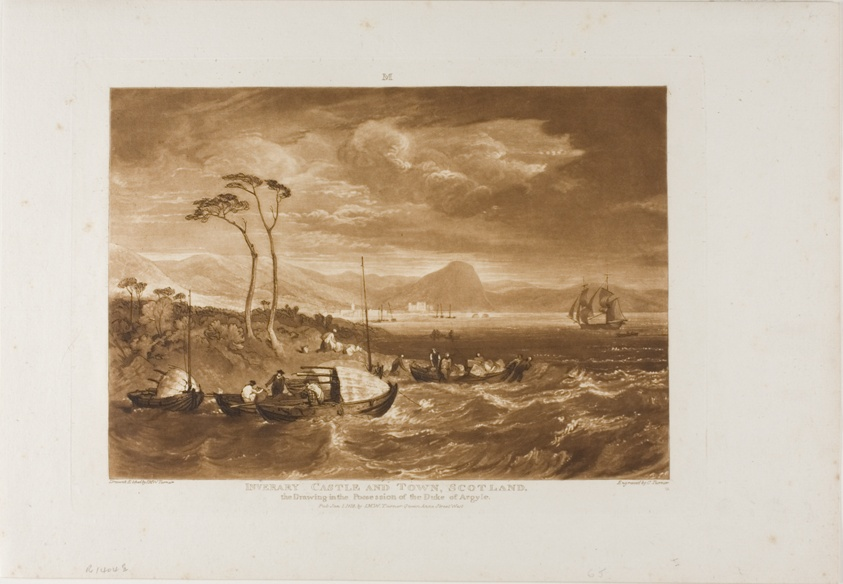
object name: Print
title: Inverary Castle and Town, plate 65 from Liber Studiorum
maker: Joseph Mallord William Turner (English, 1775-1851)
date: published January 1, 1816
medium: Etching and engraving in brown on ivory paper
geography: England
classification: etching; print; prints and drawing